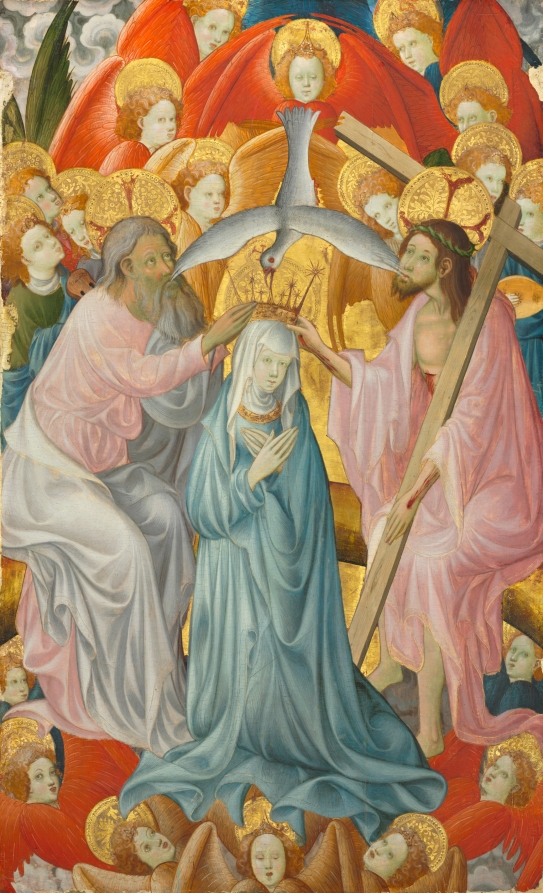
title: The Coronation of the Virgin with the Trinity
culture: Spain, Valencia, early 15th Century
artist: Master of Rubielos de Mora (Spanish)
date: c. 1400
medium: oil on panel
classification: Painting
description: The Coronation of the Virgin celebrates the culminating scene in the narrative cycle of the life of the Virgin. The subject follows Mary’s ascent into heaven after her death. Surrounded by a choir of music-making angels, the Virgin kneels to accept her crown from God and Christ. Completing the Trinity is the dove of the Holy Ghost touching its wings to their mouths. In this event, Mary takes on the role of the personification of the Church itself in her depiction as Regina Coeli or Queen of Heaven. The painter takes his name from an altarpiece in the church at Rubielos-de-Mora, Spain, though little is known about him. His style, featuring piercing eyes and protruding mouths with long slender fingers, is characteristic of Valencian art around 1400.